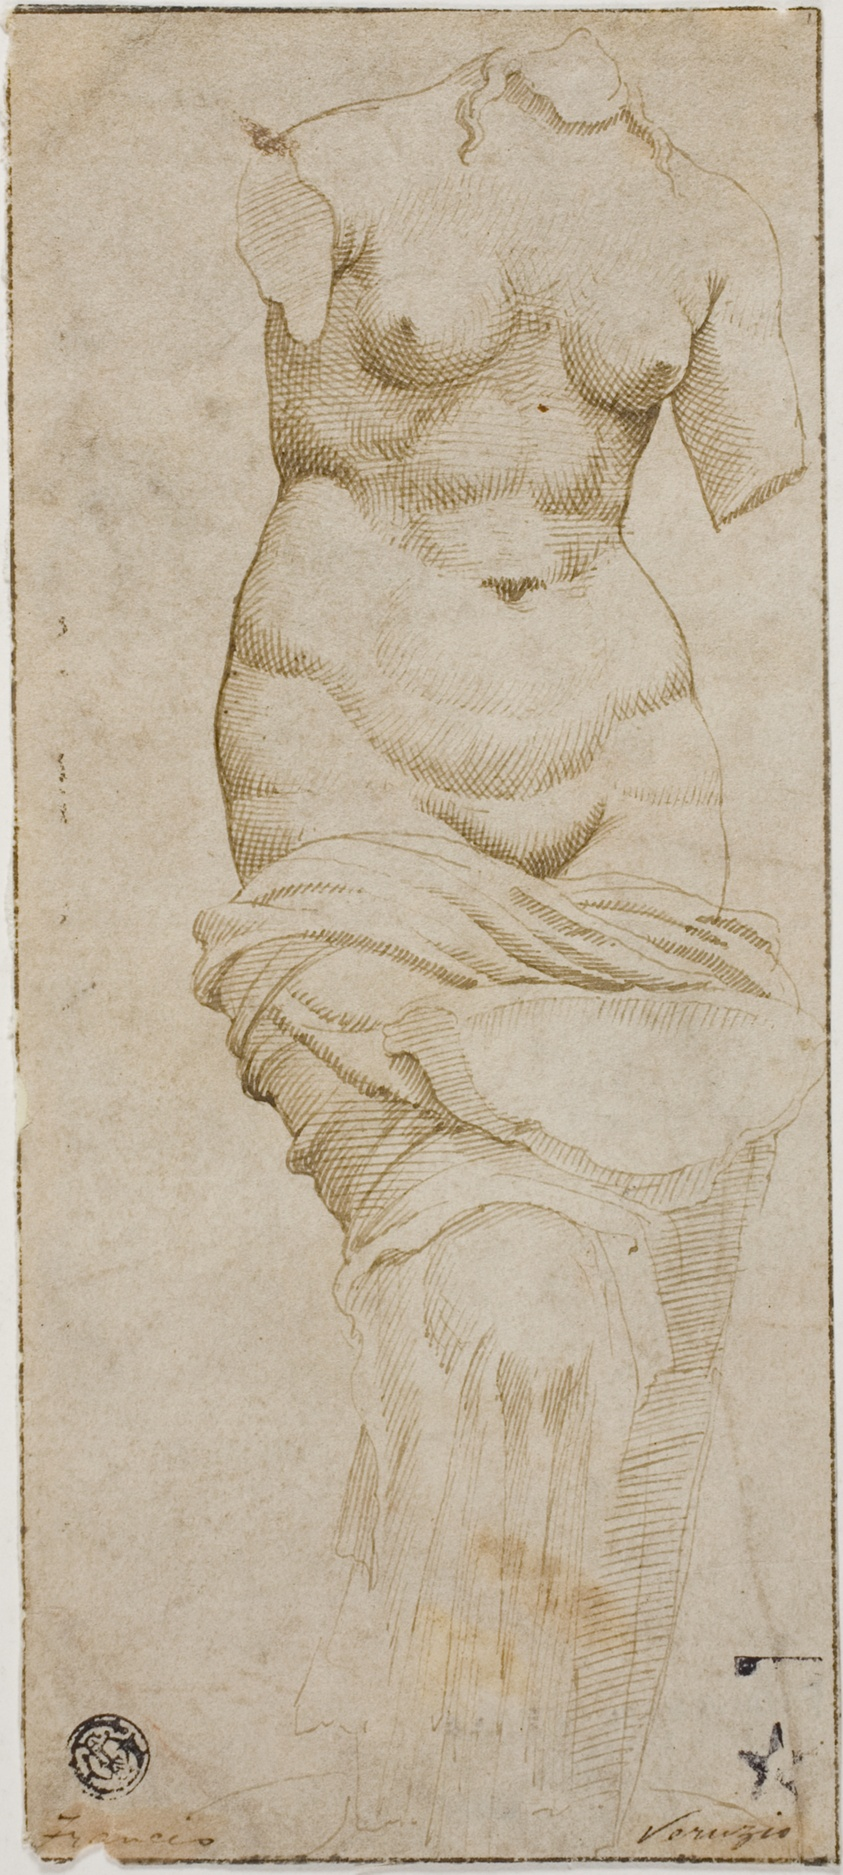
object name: Drawing and Watercolor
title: Celestial Venus (recto); Main Hall, Baths of Diocletian (verso)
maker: Circle of Maarten van Heemskerck; Netherlandish, 1498-1574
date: c. 1535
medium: Pen and brown ink (recto), and pen and brown ink, with brush and brown wash and black chalk (verso), on ivory laid paper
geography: Netherlands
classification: drawings (visual works); prints and drawing